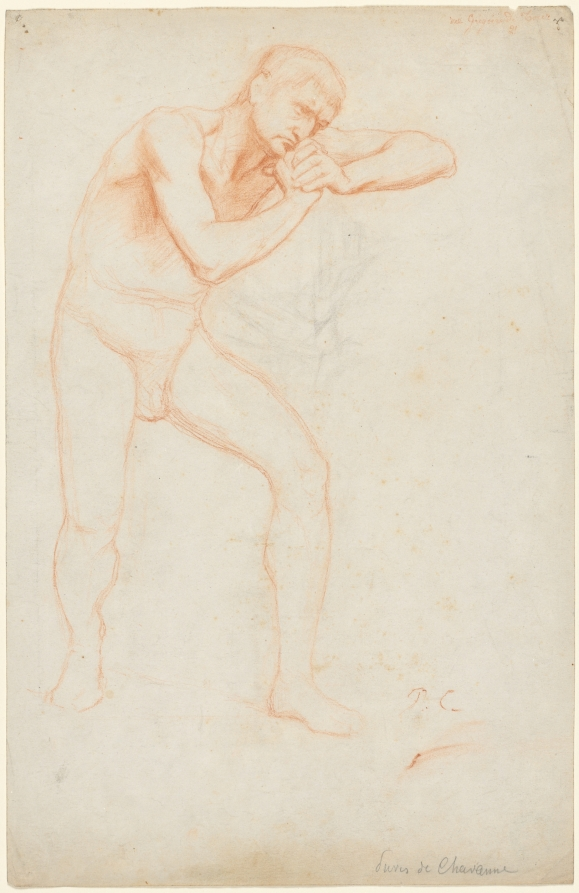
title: Male Nude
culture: France, 19th century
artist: Pierre Puvis de Chavannes (French, 1824–1898)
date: 1891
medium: red chalk and traces of black chalk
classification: Drawing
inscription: signed, lower right, in red chalk: P.C. ; [by artist?], upper right, in red chalk: rue Grégoire de Cour / 21 ; lower right, in graphite: Puvis de Chavanne